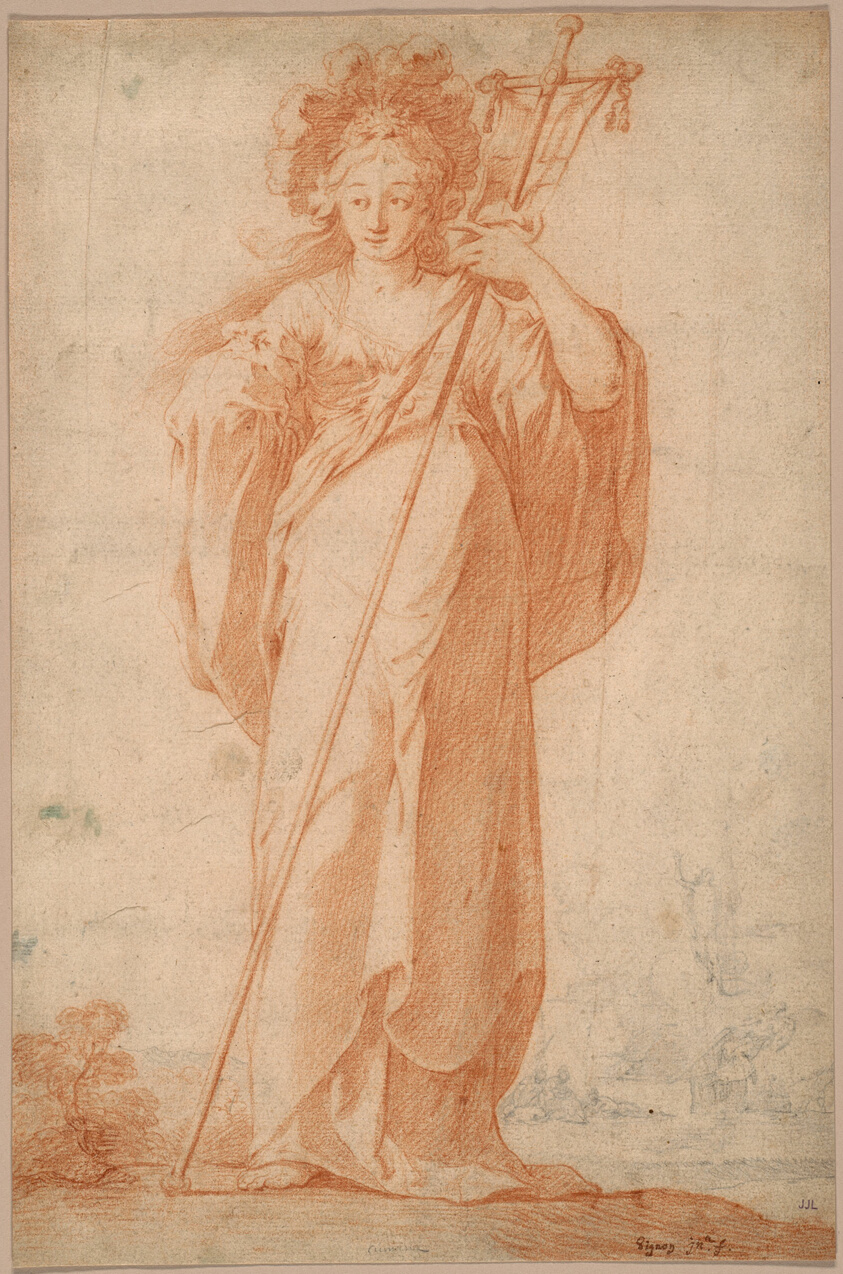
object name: Drawing and Watercolor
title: The Cumean Sibyl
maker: Claude Vignon (French, 1593-1670)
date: c. 1630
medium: Red and black chalk on laid paper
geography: France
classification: chalk; paper; prints and drawing